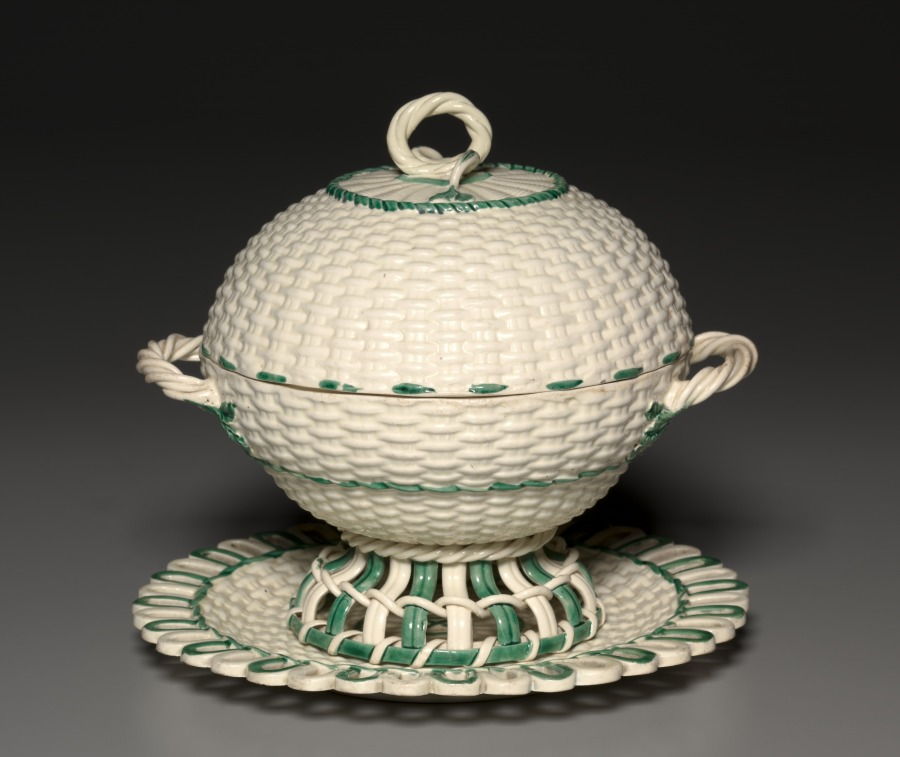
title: Wicker-Work Covered Sauce Tureen on Stand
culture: England, 18th-19th century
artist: Wedgwood Factory (British)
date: c. 1780–1840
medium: earthenware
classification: Ceramic